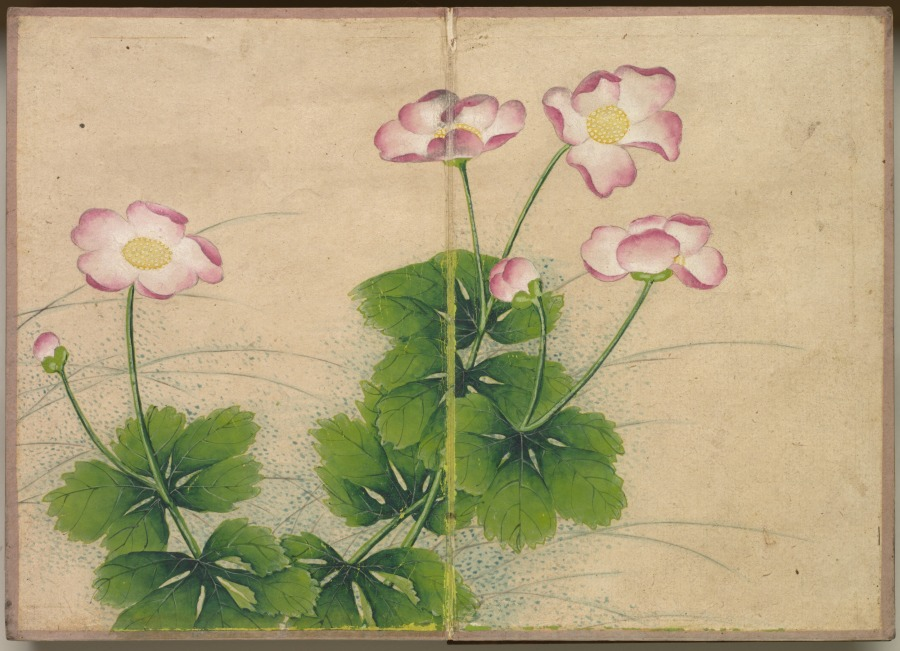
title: Desk Album: Flower and Bird Paintings (mallow flowers)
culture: China, Qing dynasty (1644-1911)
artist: Zhang Ruoai (Chinese, 1713–1746)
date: 1700s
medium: album leaf, ink and color on paper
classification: Painting